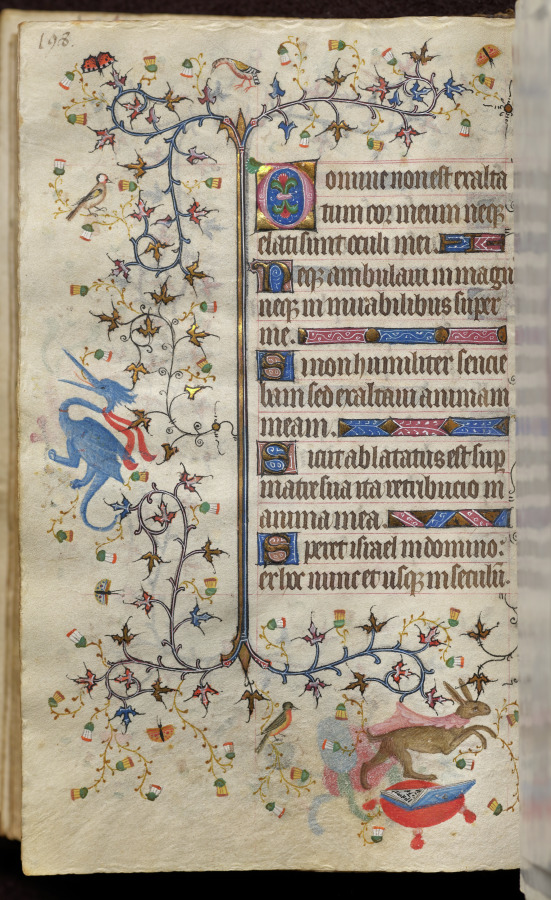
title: Hours of Charles the Noble, King of Navarre (1361-1425): fol. 99v, Text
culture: France, Paris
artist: Master of the Brussels Initials and Associates (French)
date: c. 1405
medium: ink, tempera, and gold on vellum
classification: Bound Volume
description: This precious volume was obviously highly prized by its owner, the French-born King of Navarre, who had his coat of arms painted on no less than twenty folios. Rather than directly commissioning this manuscript from a specific workshop, it seems that Charles the Noble acquired his book of hours -- perhaps ready-made for the luxury market -- while on a trip to Paris in 1404-05. A collaborative effort, six painting styles are evidenced within the pages of this codex, those of two Italians, two Frenchmen, and two Netherlanders. The painter who was responsible for the planning and decoration of the book, and who produced seventeen of the large miniatures, was a Bolognese artist known as the Master of the Brussels Initials. His principal assistant, responsible for most of the borders, was a Florentine who signed his name "Zecho" da Firenze on folio 208 verso.